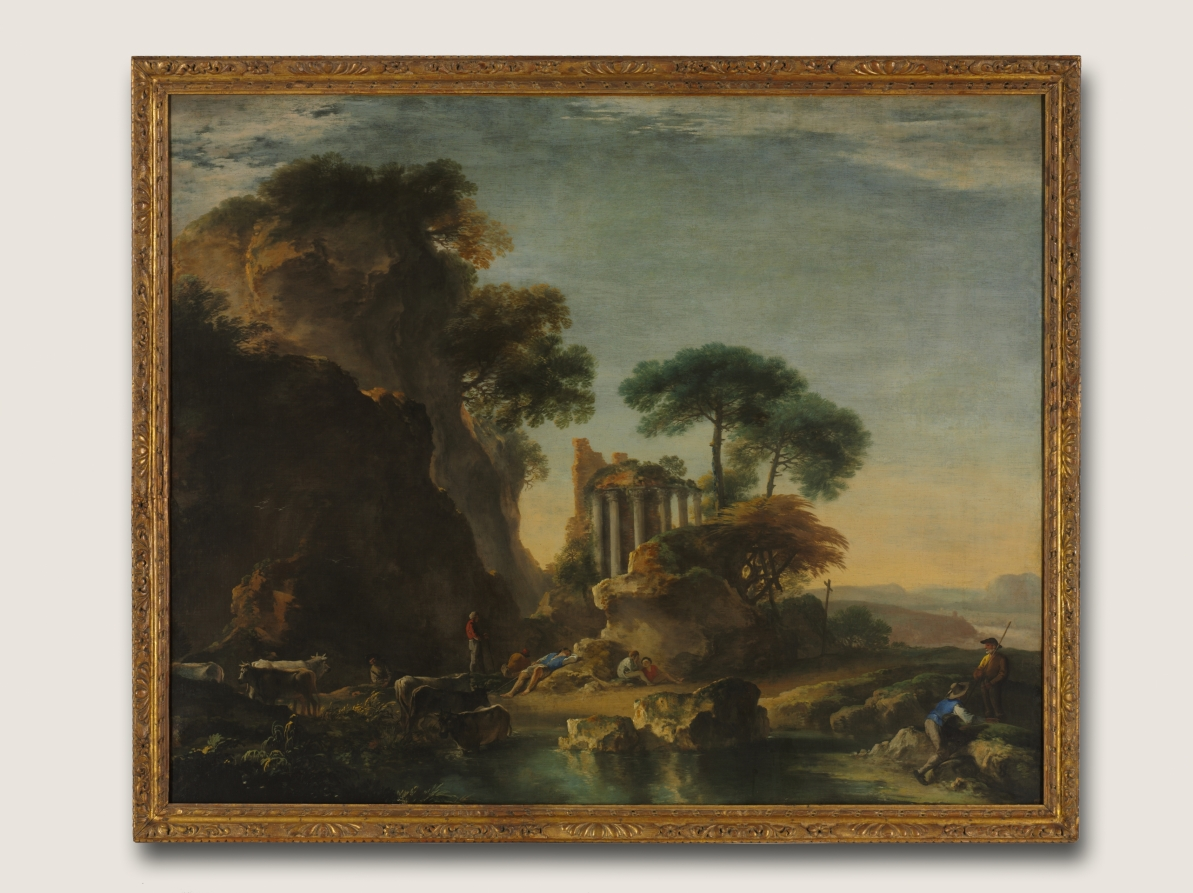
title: Ruins in a Rocky Landscape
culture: Italy, 17th century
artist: Salvator Rosa (Italian, 1615–1673)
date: c. 1640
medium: oil on canvas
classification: Painting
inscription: Signed lower right: "SR [monogram]"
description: In 1635, Rosa left his native Naples for Rome, the undisputed art center of the 17th century, where a new type of landscape painting was emerging, distinguished by the effects of light and atmosphere. Rosa’s fame grew quickly as a painter of landscapes that conjured the beauty and fertility of the Bay of Naples. Ruins in a Rocky Landscape incorporates classical ruins, iridescent reflections of light, and a pastoral tone evoked by the idling shepherds, exemplifying the work that earned Rosa his early fame. The dark, dramatic rocks that rise along the left foreshadow the wildness that Rosa would cultivate in his later sublime landscapes.